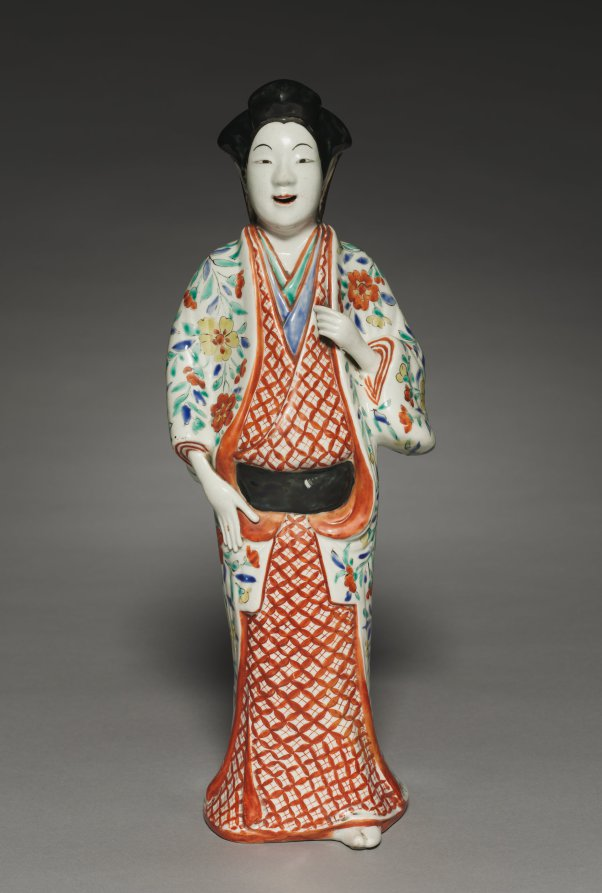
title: Standing Figure of a Beauty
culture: Japan, Edo period (1615–1868)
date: c. 1690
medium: Porcelain with overglaze color enamels (Hizen ware, Kakiemon type)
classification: Ceramic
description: Dressed in layered robes and a jacketlike garment called an uchikake with a lively floral design, figures such as this one may have derived from dolls formed in the likeness of courtesans. It was produced in Hizen Province (in present-day Saga Prefecture on the island of Kyushu) by the Sakaida family of ceramists, the head of which has gone by the first name Kakiemon for many generations. As a result, the studio’s historical works are known as Kakiemon ware. The studio is distinguished for being among the earliest in Japan to use multicolor overglaze enamel and for the milky white of its porcelain.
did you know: Look closely! One of this fashionable woman's feet is peeking out from under her layered kimono.